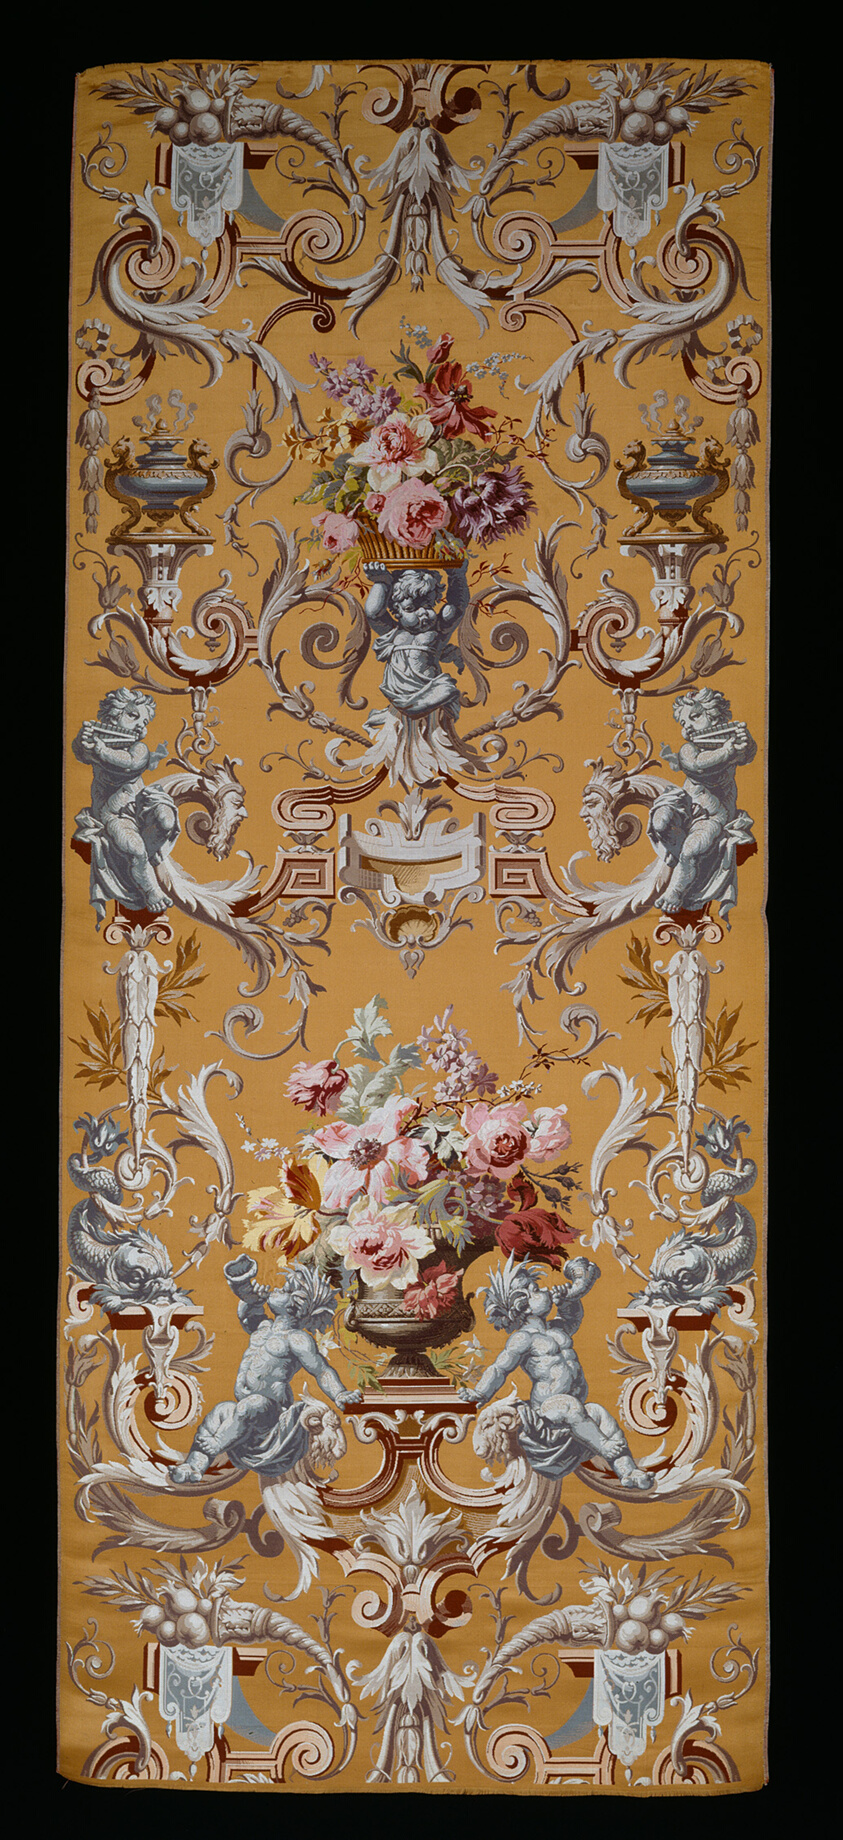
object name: Textile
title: Panel (Furnishing Fabric)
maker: Produced by Mathevon et Bouvard, 1810–1895; France, Lyon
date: 1860/80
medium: Silk, satin weave with twill interlacings of secondary binding warps and patterning and brocading wefts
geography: Lyon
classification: textile; weaving; furnishing textile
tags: flowers, baskets, pedestals, urns, foliage, cupids